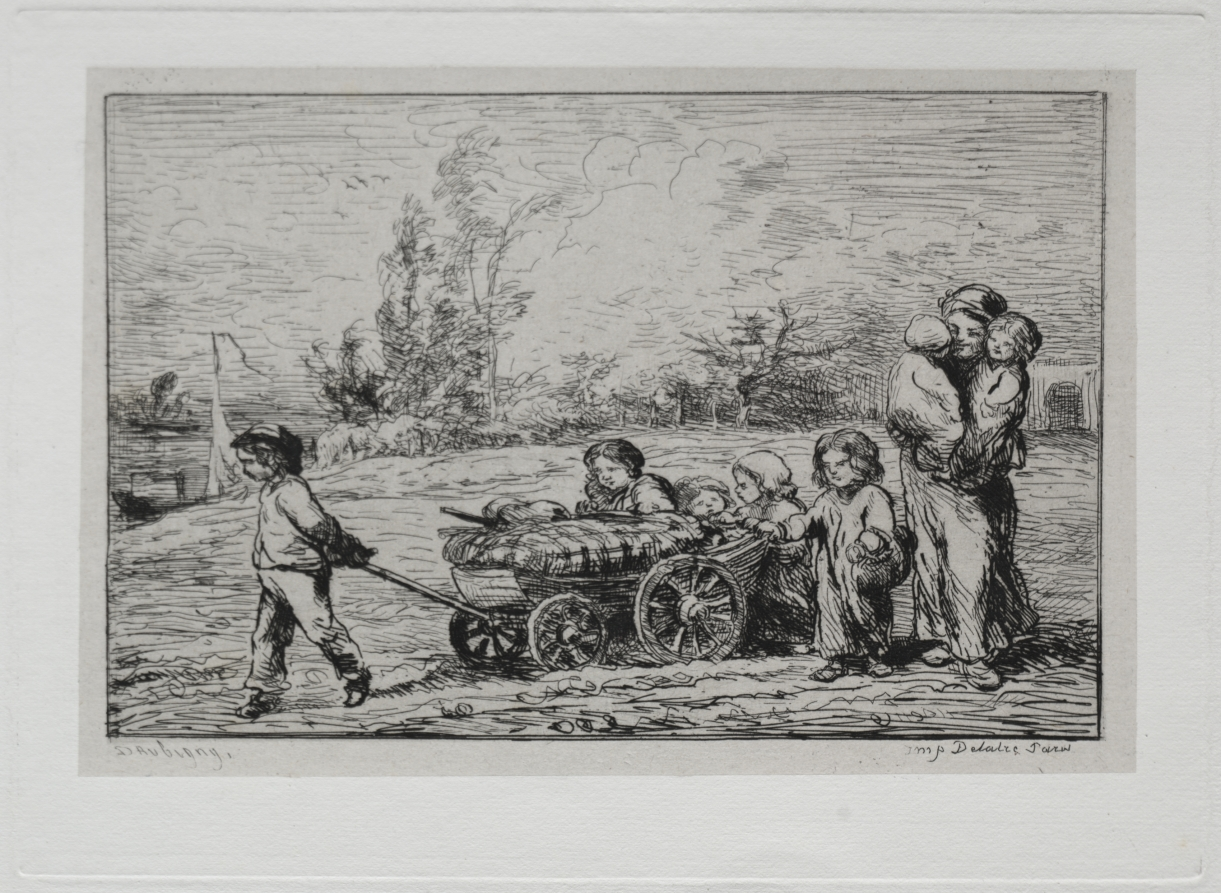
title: The Boat Trip: Moving into "Le Botin" (The Ship's Furnishings) or Moving to the Boat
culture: France, 19th century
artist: Charles François Daubigny (French, 1817–1878)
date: 1861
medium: etching with chine collé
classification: Portfolio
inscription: Lower left corner, in graphite: L. D. 101